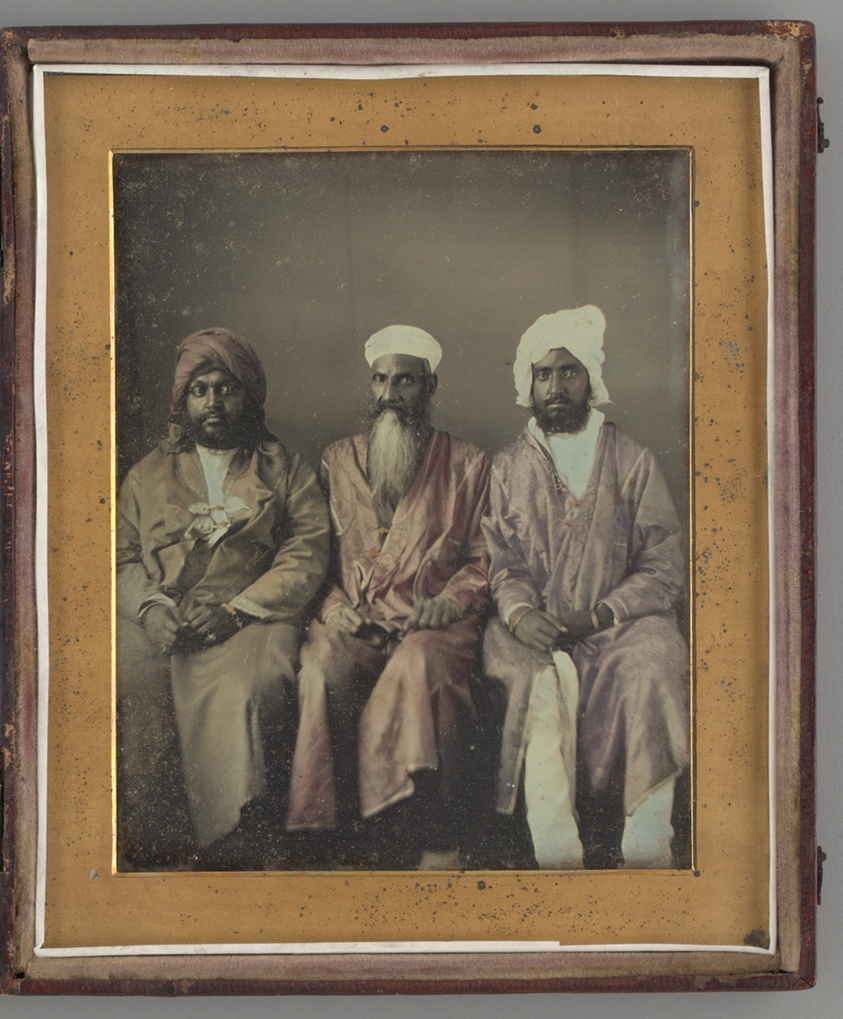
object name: Photograph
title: Untitled (Portait of Three Seated Men Wearing Turbans)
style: 19th century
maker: William Johnson; American, born 1823–1880s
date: 1853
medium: Daguerreotype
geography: United States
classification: portrait; photograph; photographic process; photography; portrait; daguerreotype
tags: lundberg collection, portraits, portraits: male subject, people, men, portraits: multiple subjects, portrait, headwear